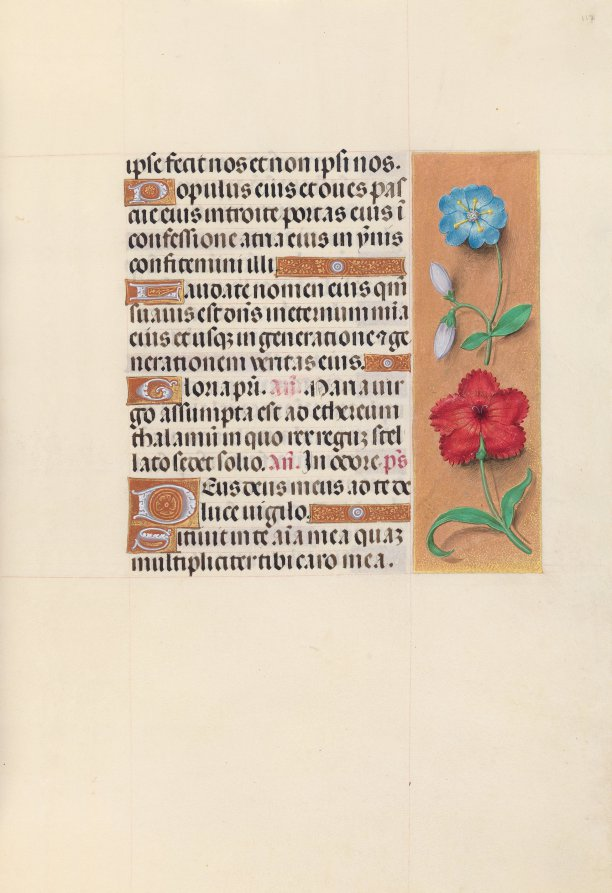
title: Hours of Queen Isabella the Catholic, Queen of Spain: Fol. 117r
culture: Flanders, Ghent and Bruges, late 15th century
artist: Master of the First Prayerbook of Maximillian (Flemish, c. 1444–1519)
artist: and Associates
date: c. 1500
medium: ink, tempera, and gold on vellum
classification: Bound Volume